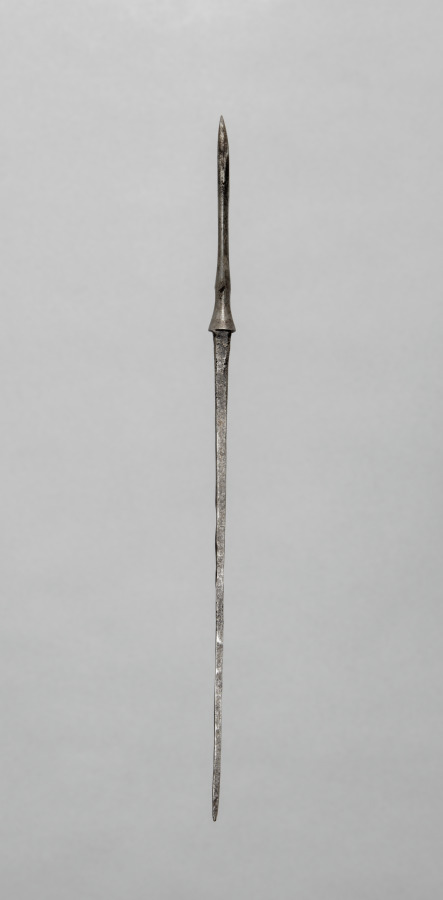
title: Arrow Point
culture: Japan, Edo period (1615–1868)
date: 1700s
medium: steel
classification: Arms and Armor